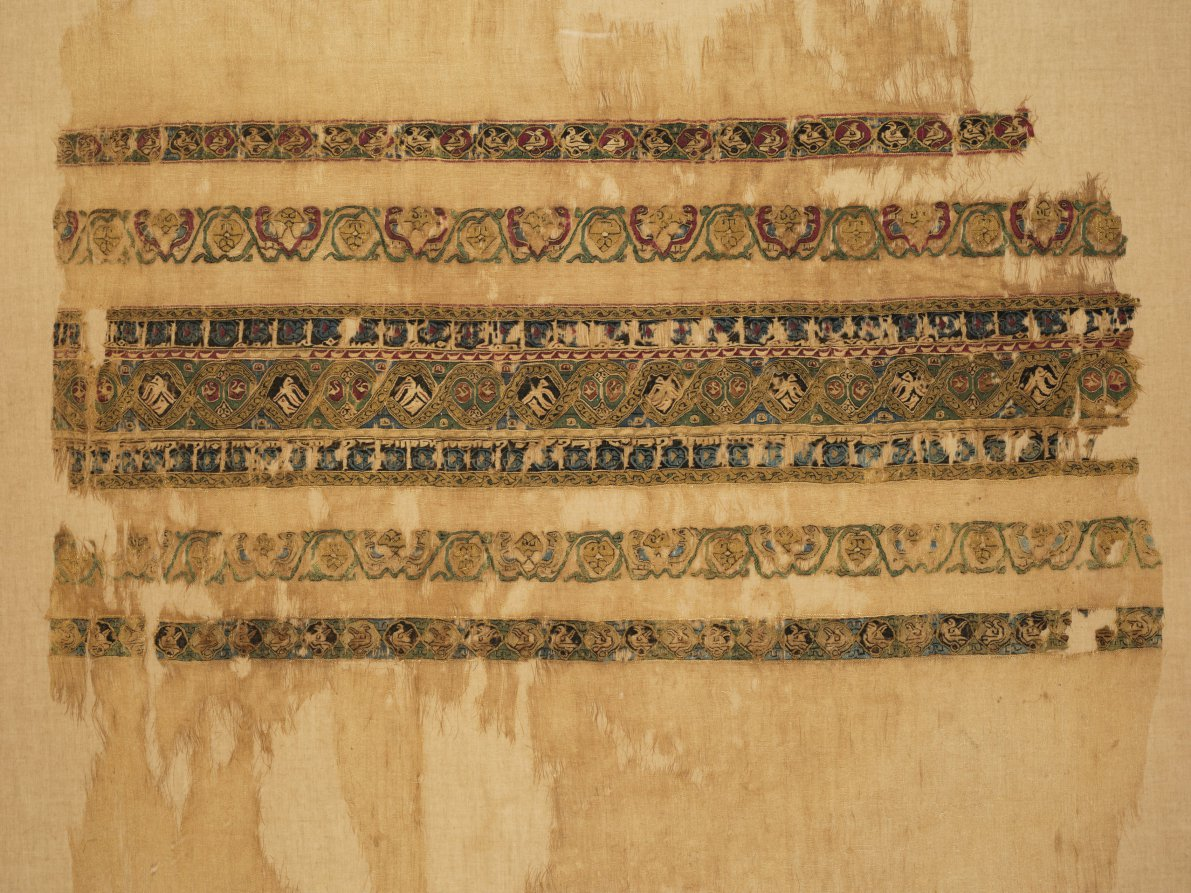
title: Turban or shawl end with tiraz and gold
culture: Egypt, Fatimid period, reign of al-Musta‘lī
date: 1094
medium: plain weave with inwoven tapestry weave: linen, silk, and gold filé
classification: Textile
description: Woven with consummate skill, this very fine linen fabric enriched with silk and gold thread displays small birds amid interlacing bands flanked by Arabic inscriptions. It represents the final artistic and technical height of imperial textiles called tiraz, a Persian word meaning embroidery or decorative work. Here, tiraz refers to textiles with Arabic inscriptions; it can also identify court workshops and their production. The historical Arabic inscription, written in angular Kufic script with decorative letter bowls and palmette scrolls between shafts, reads: “proximate victory to the servant of God and his close friend Ma‘add Abū Tamīm, the imam Ahmad [Abū] al-Qāsim al-Musta‘lī bi-Allāh and his so[ns]” (upper line), and “Commander of the believers bin [a] l-Qāsim Shā[han] shah . . . the believers . . . the Muslims[?] and the believers[?]” (lower line).